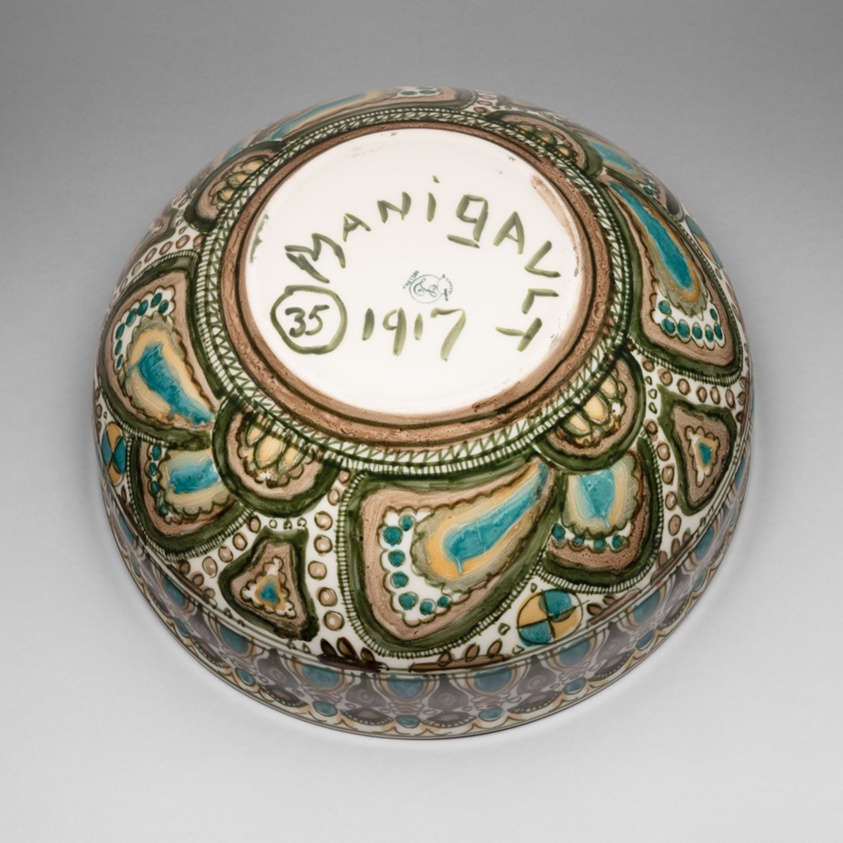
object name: Ceramics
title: Bowl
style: Modernism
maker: Designed by Edward Middleton Manigault (American, born Canada, 1887–1922); Manufactured by Lenox, Inc. (American, founded 1889); Trenton, New Jersey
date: 1917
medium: Porcelain with enamel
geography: Trenton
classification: decorative arts; american decorative arts; art of the americas; pottery; enamel; porcelain; bowl; ceramics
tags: dining, drinking